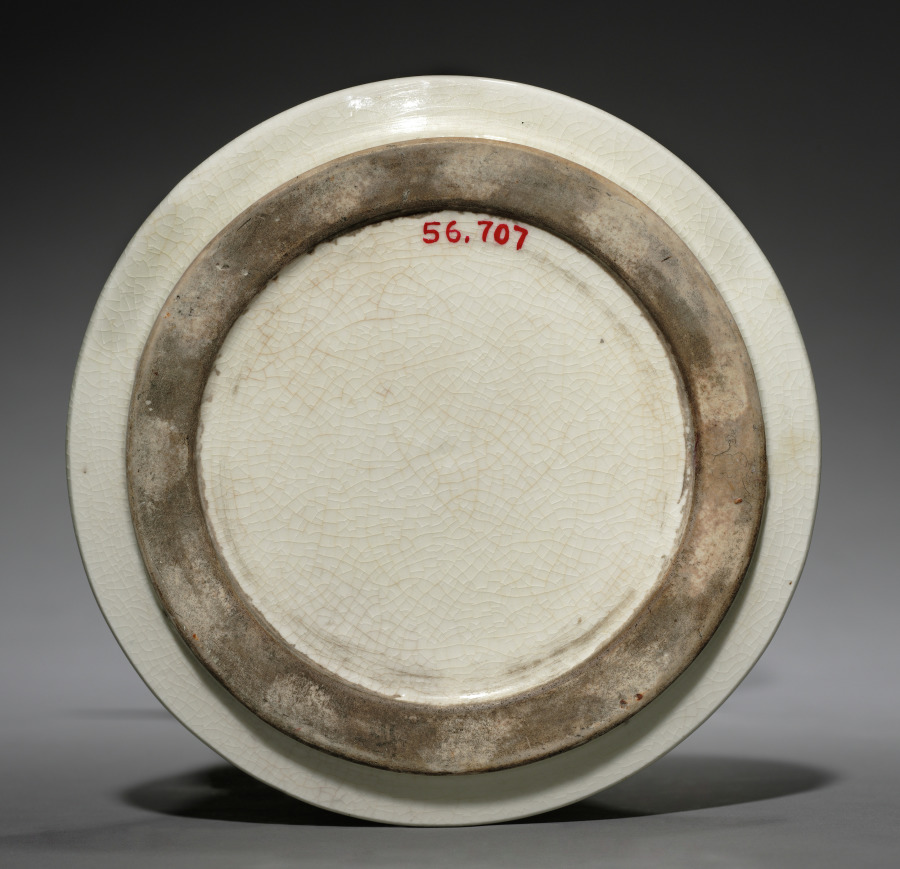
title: Beaker Vase: Zun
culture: China, Qing dynasty (1644-1911), Kangxi reign (1661-1722)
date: 1661–1722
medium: porcelain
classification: Ceramic